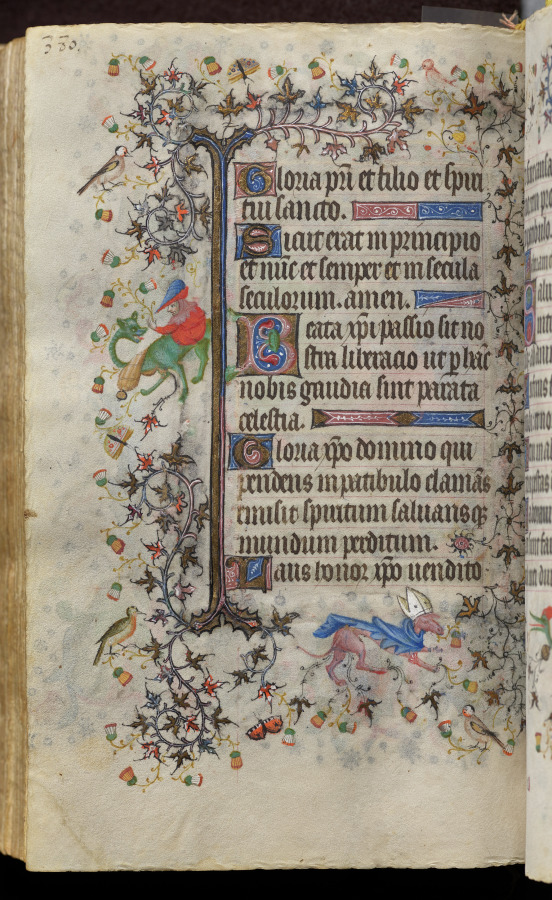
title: Hours of Charles the Noble, King of Navarre (1361-1425): fol. 185v, Text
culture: France, Paris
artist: Master of the Brussels Initials and Associates (French)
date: c. 1405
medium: ink, tempera, and gold on vellum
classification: Bound Volume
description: This precious volume was obviously highly prized by its owner, the French-born King of Navarre, who had his coat of arms painted on no less than twenty folios. Rather than directly commissioning this manuscript from a specific workshop, it seems that Charles the Noble acquired his book of hours -- perhaps ready-made for the luxury market -- while on a trip to Paris in 1404-05. A collaborative effort, six painting styles are evidenced within the pages of this codex, those of two Italians, two Frenchmen, and two Netherlanders. The painter who was responsible for the planning and decoration of the book, and who produced seventeen of the large miniatures, was a Bolognese artist known as the Master of the Brussels Initials. His principal assistant, responsible for most of the borders, was a Florentine who signed his name "Zecho" da Firenze on folio 208 verso.